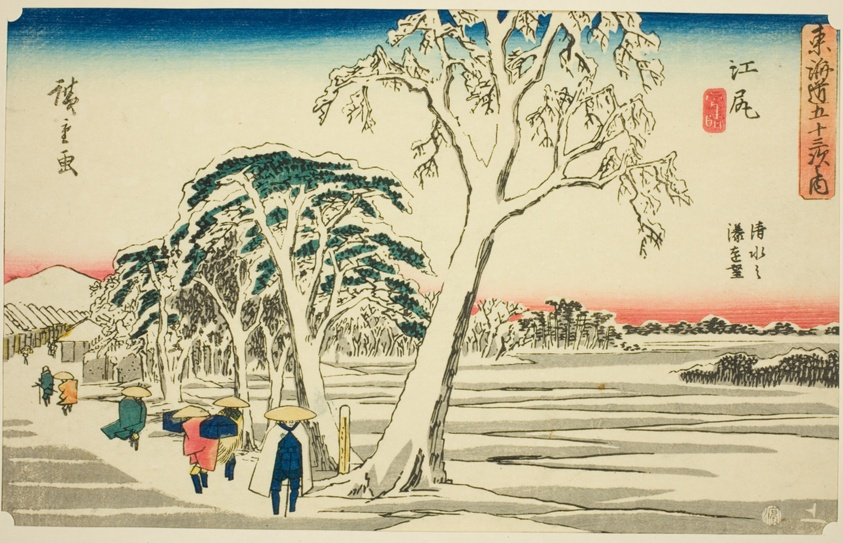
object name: Print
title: Ejiri: Distant View of Shimizu Harbor in Clear Weather after Snowfall (Ejiri, Shimizu no minato enbo, yukibare), from the series "Fifty-three Stations of the Tokaido (Tokaido gojusan tsugi no uchi)," also known as the Gyosho Tokaido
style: Japanese (culture or style)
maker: Utagawa Hiroshige 歌川 広重; Japanese, 1797-1858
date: c. 1841/44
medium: Color woodblock print; aiban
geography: Japan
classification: woodblock print; print; asian art